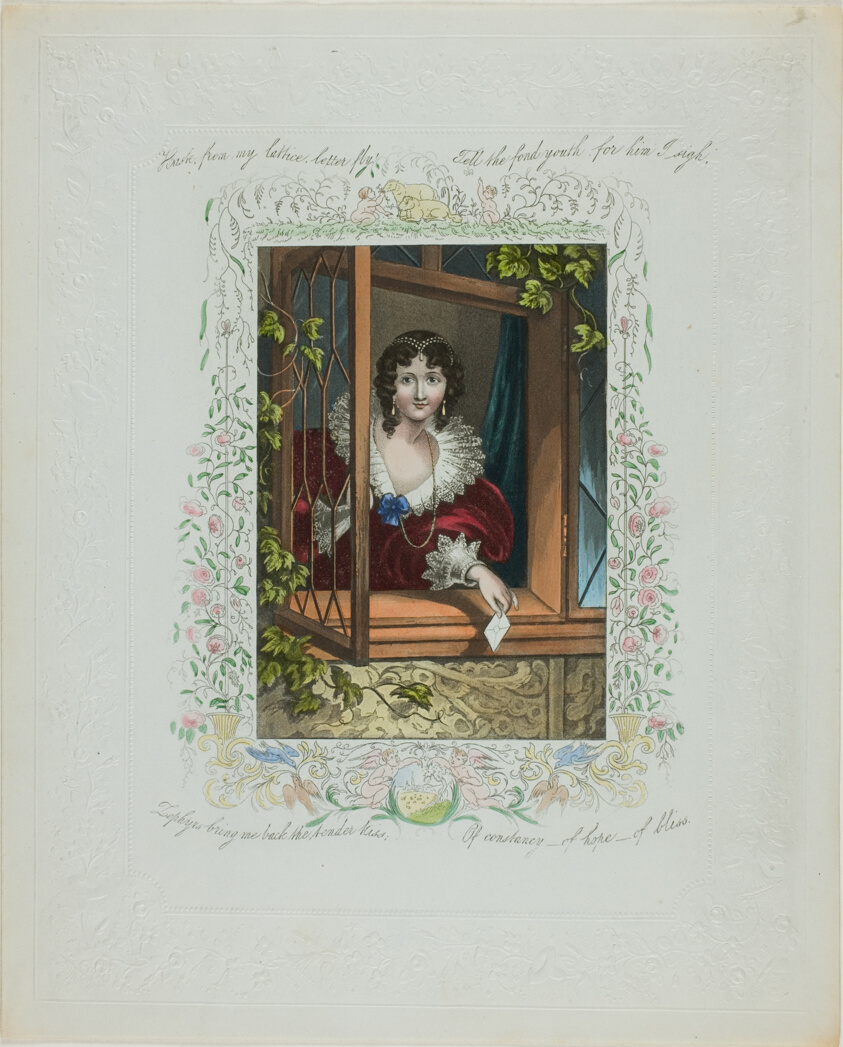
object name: Print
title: Haste From My Lattice, Letter Fly! (valentine)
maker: Unknown Artist; English, 19th century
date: c. 1850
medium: Lithograph with hand-coloring on embossed off-white wove paper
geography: England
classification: valentine; prints and drawing; print